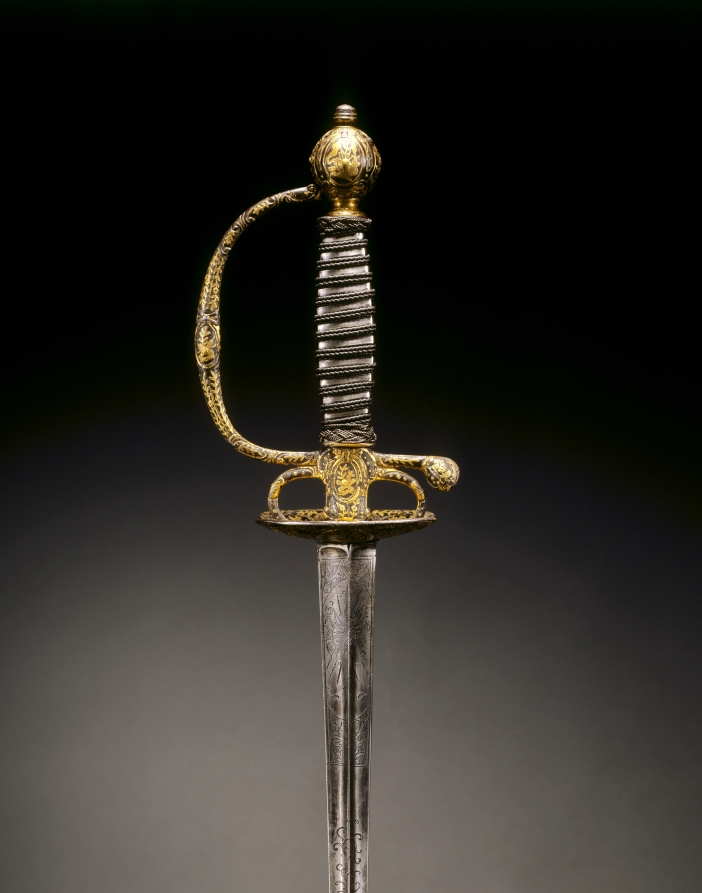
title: Smallsword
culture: France, Paris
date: c. 1730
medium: steel, blued, with gold encrusted decoration; chased and engraved; silver wire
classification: Arms and Armor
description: During the 1700s, the small-sword emerged as a light, quick weapon. Like the rapier it was carried by unarmored civilians, the noblemen of the upper classes. Over time this delicate sword became more an accessory of male attire than a weapon essential to life and death. The sword hilt, which shows even when the blade is sheathed, became the ground for elaborate decoration. These small swords thus represent the final stage in the evolution of the sword, from the edged weapons of antiquity to the elegantly refined blades of the 1700s and 1800s.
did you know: The decorative design of the hilt was often carried down onto the blade, which could be chased or etched with designs, and gilded or blued as seen here.